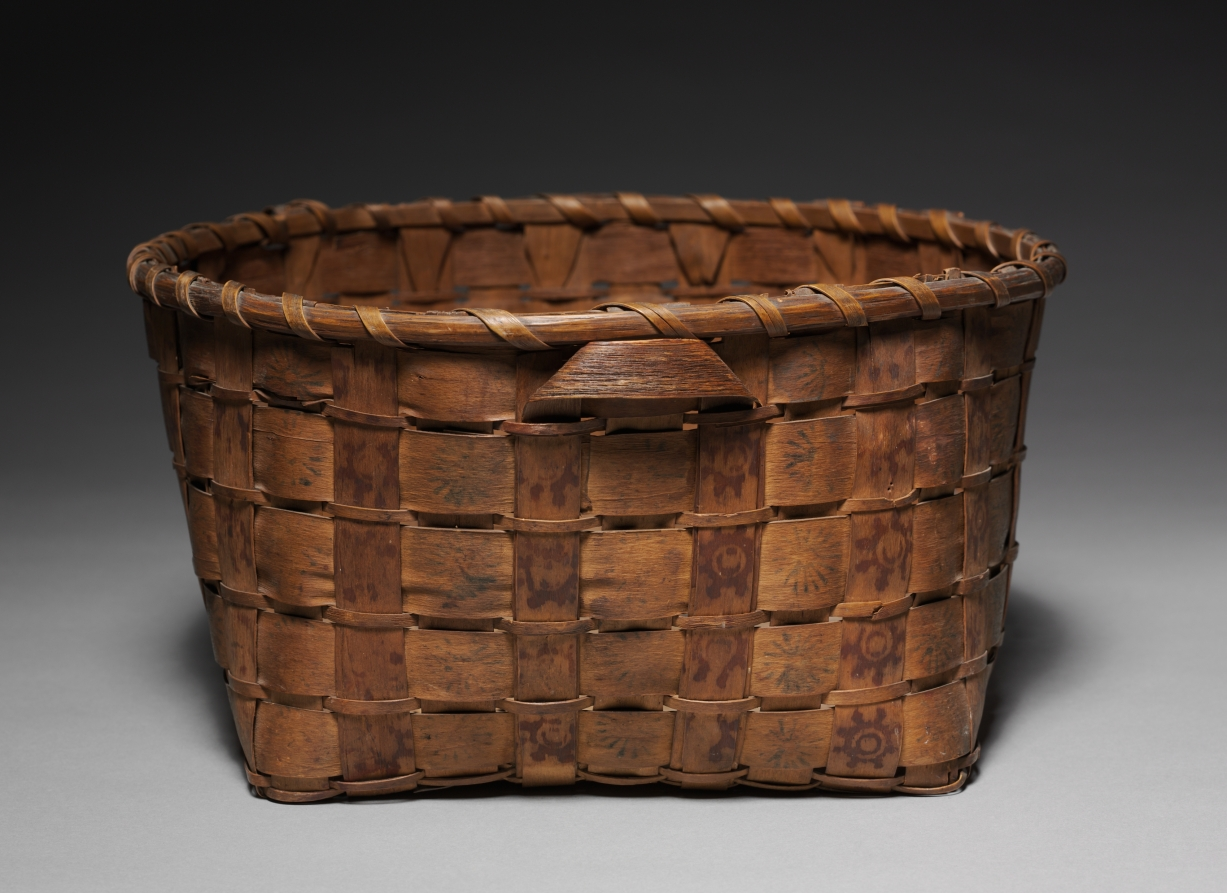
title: Basket with Stamped Decoration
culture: Native North America, Woodlands, Algonquian or Haudenosaunee (Iroquois), Post-contact Period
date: early 1800s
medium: ash? strips, pigment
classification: Basketry